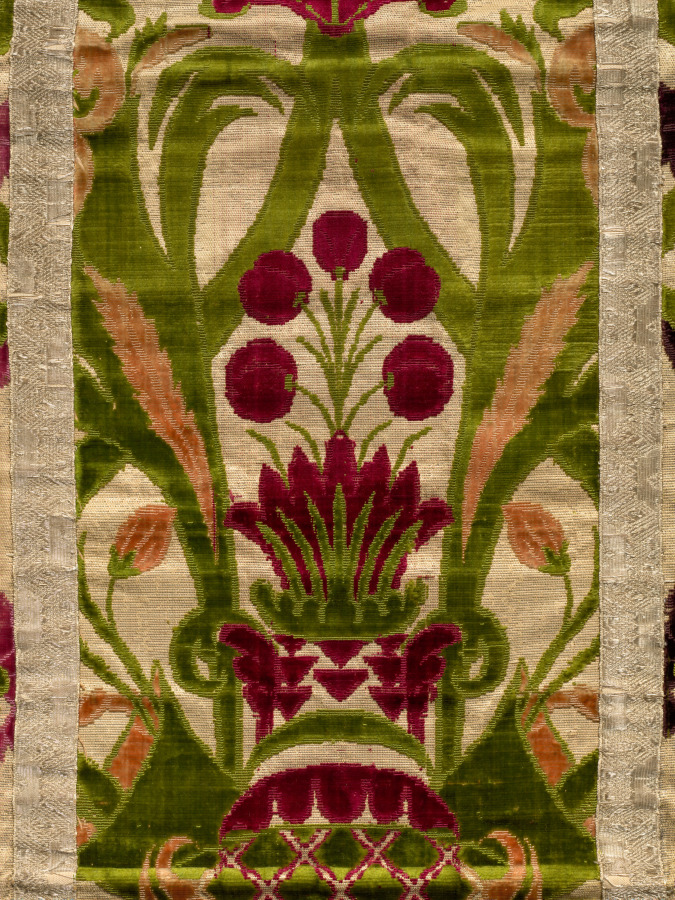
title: Chasuble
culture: Italy, Genoa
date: c 1600–1700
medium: Silk and gilt metal threads, woven; cut and uncut velvet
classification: Velvet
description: This sumptuous polychrome velvet displays a central vase with abundant flora and exotic leaves flanking curving blossoming fronds on a gilt-metal thread ground. The pattern was created with five colors of cut and uncut (loops) velvet pile. Only the pile warps for the lush green velvet occur across the entire cloth, while each additional color appears in vertical stripes—crimson, peach, rose, and purple. These widely acclaimed velvets from Genoa were the most colorful woven in Europe. Both the long stole and the shorter maniple are insignia of the office of deacons, priests, and the higher clergy. The stole was worn under a chasuble according to the office and the maniple was hung on the left forearm. The burse is a stiff receptacle in which the folded corporal, a white linen cloth on which the sacred bread and chalice are placed during the Mass, is carried to and from the altar. The upper fabric matches the chasuble, the bottom is a plain silk, and the interior has an obligatory linen lining.